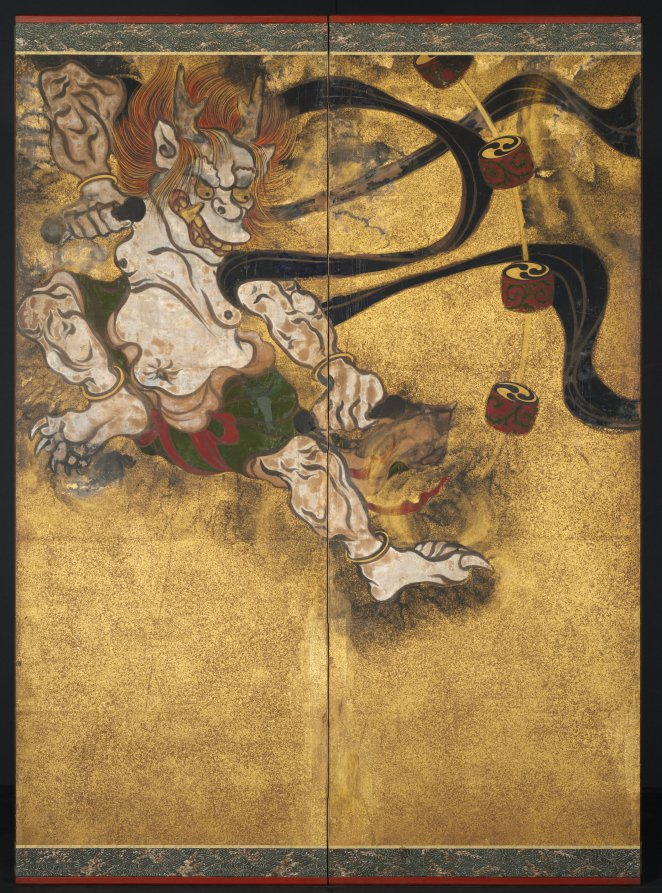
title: God of Thunder (Raijin)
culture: Japan, Edo period (1615–1868)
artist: studio of Tawaraya Sōtatsu (Japanese, c. 1570–c. 1640)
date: mid-1600s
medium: six-panel folding screen; ink, color, and gold on paper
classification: Painting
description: Such depictions of the God of Thunder originated in Buddhist art. Here, the image was painted on paper covered with gold dust, a technique often found in paintings by Tawaraya Sotatsu or of the Sotatsu school. This gold technique and the "Inen" seal here suggest that the anonymous painter of this screen was probably associated with the Sotatsu workshop. The artist used a prototype borrowed from earlier Japanese narrative painting—rather than mechanically reproducing Sotatsu’s image—and created a bold, innovative image that served the world of play and leisure in early Edo Japan. The theme of "God of Thunder" was often paired with "God of Wind" and has been frequently reinterpreted by generations of Rimpa artists. Unfortunately, the screen God of Wind which would have accompanied this God of Thunder cannot be located.